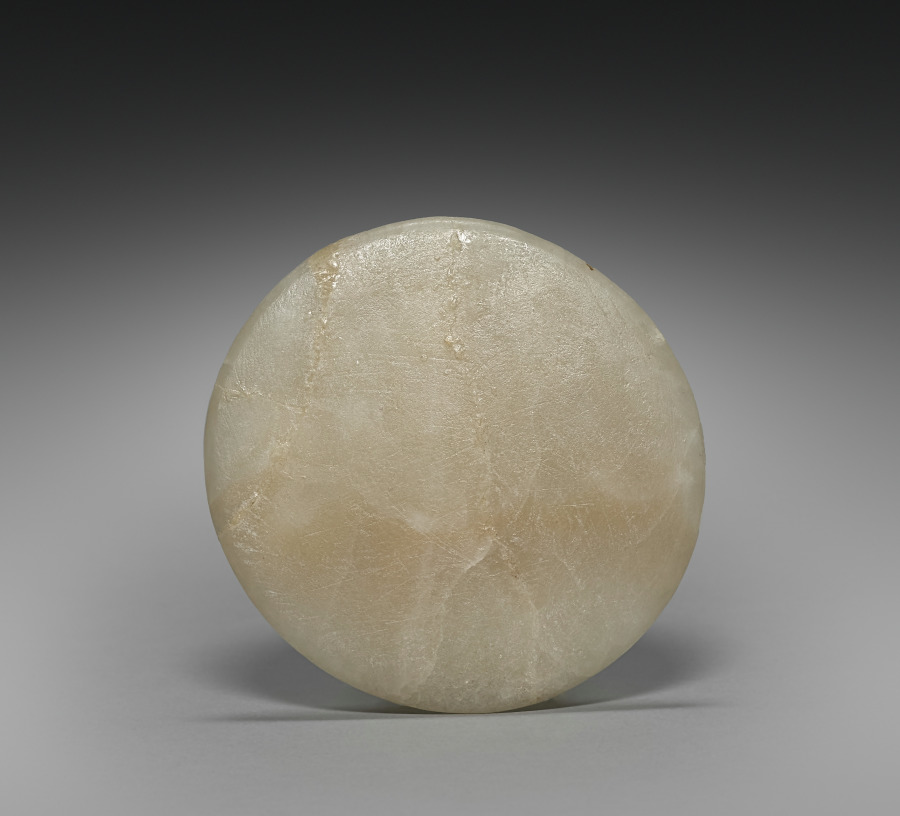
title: Long-Necked Flask with Strap Handle and Lid (Lid)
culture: Egypt, New Kingdom (1540–1069 BCE), Dynasty 18, reign of Tuthmosis III (1479–1425 BCE)–reign of Amenhotep III (1390–1352 BCE)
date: 1401–1353 BCE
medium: travertine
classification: Vessels